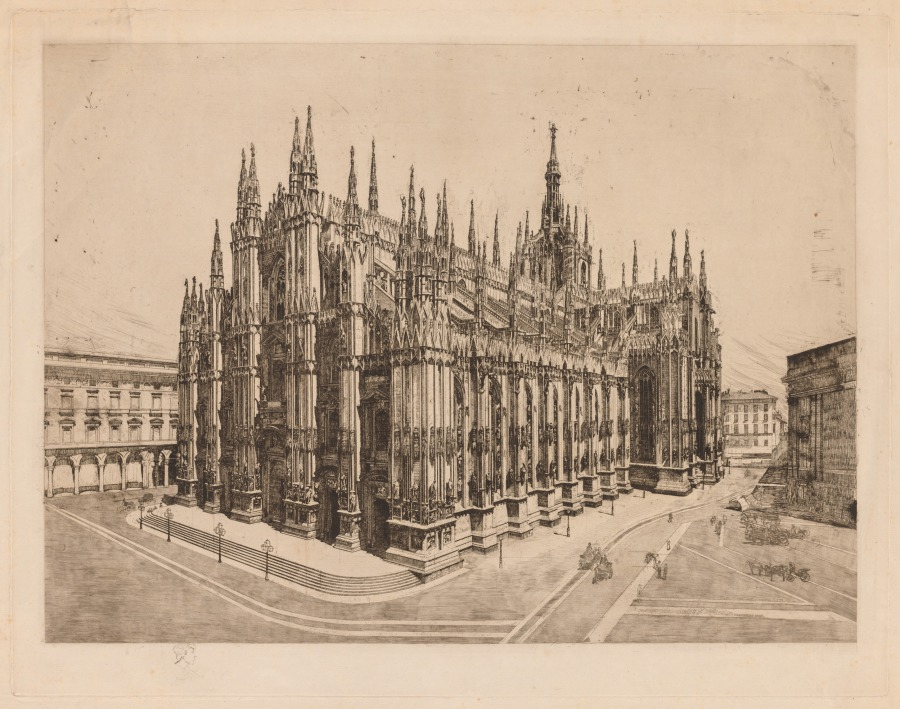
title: Cathedral, Milan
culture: America, late 19th-early 20th century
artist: Otto H. Bacher (American, 1856–1909)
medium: etching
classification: Print